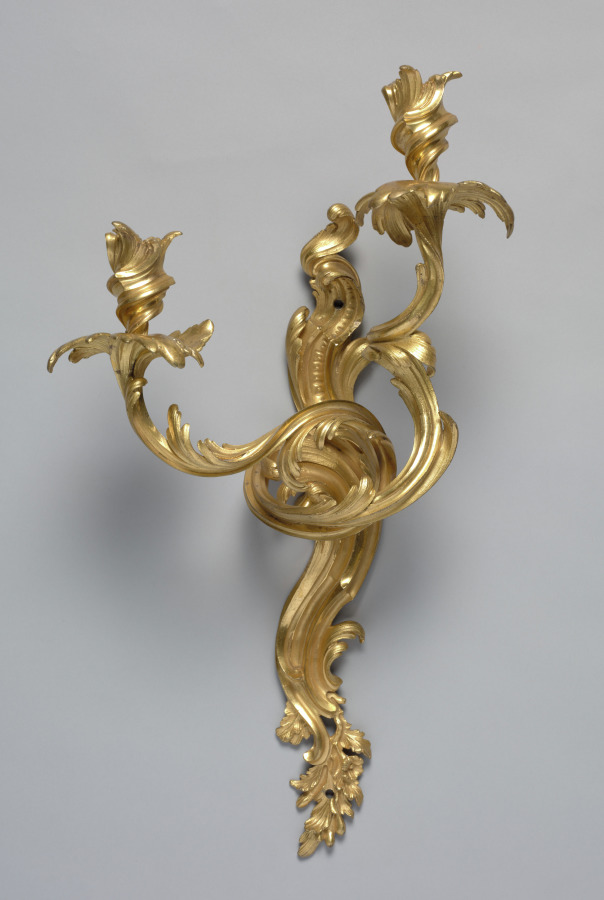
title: Candle Bracket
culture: France, 18th century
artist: attributed to Jean Joseph de Saint-Germain (French, 1720–1791)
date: c. 1750–1760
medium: gilt bronze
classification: Furniture and woodwork